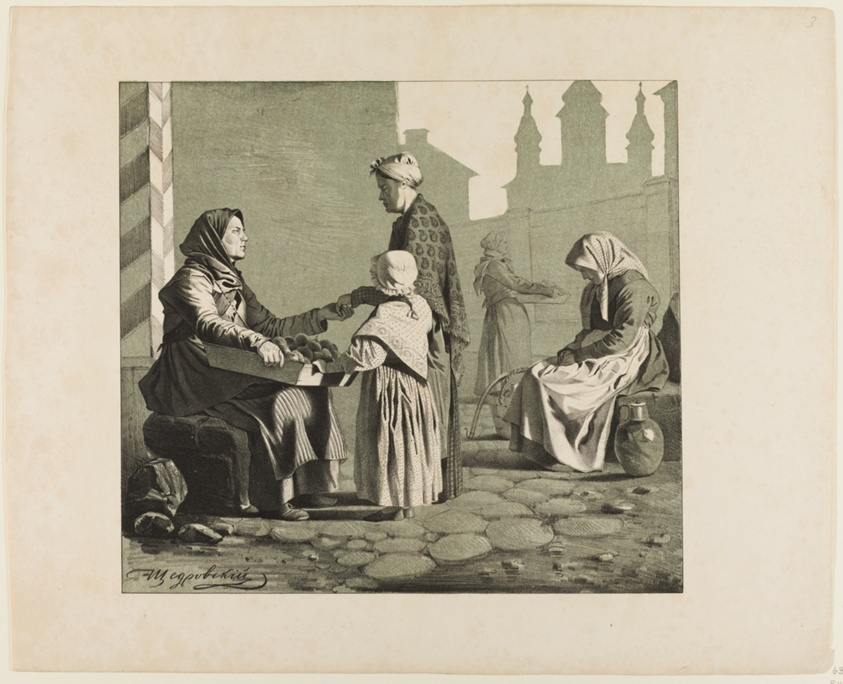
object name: Print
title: Scenes from Russian Folk Life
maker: Ignatii Stepanovich Shchedrovskii (Russian, 1815-1870)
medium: Color lithograph on paper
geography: Russia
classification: lithograph; print; prints and drawing